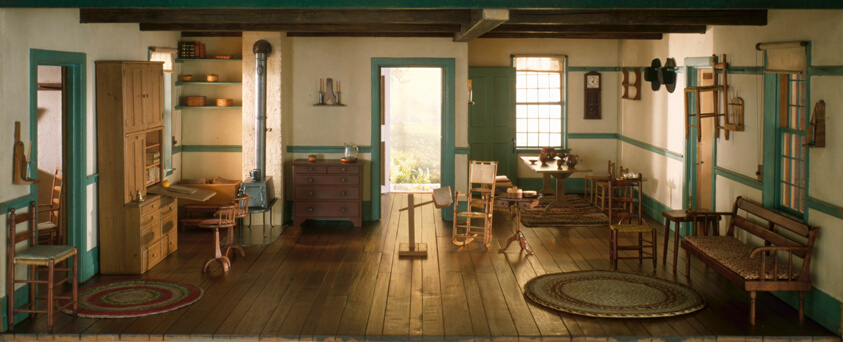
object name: Miniature room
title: A18: Shaker Living Room, c. 1800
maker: Designed by Narcissa Niblack Thorne; American, 1882-1966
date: c. 1940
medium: Miniature room, mixed media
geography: United States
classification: miniature; thorne rooms